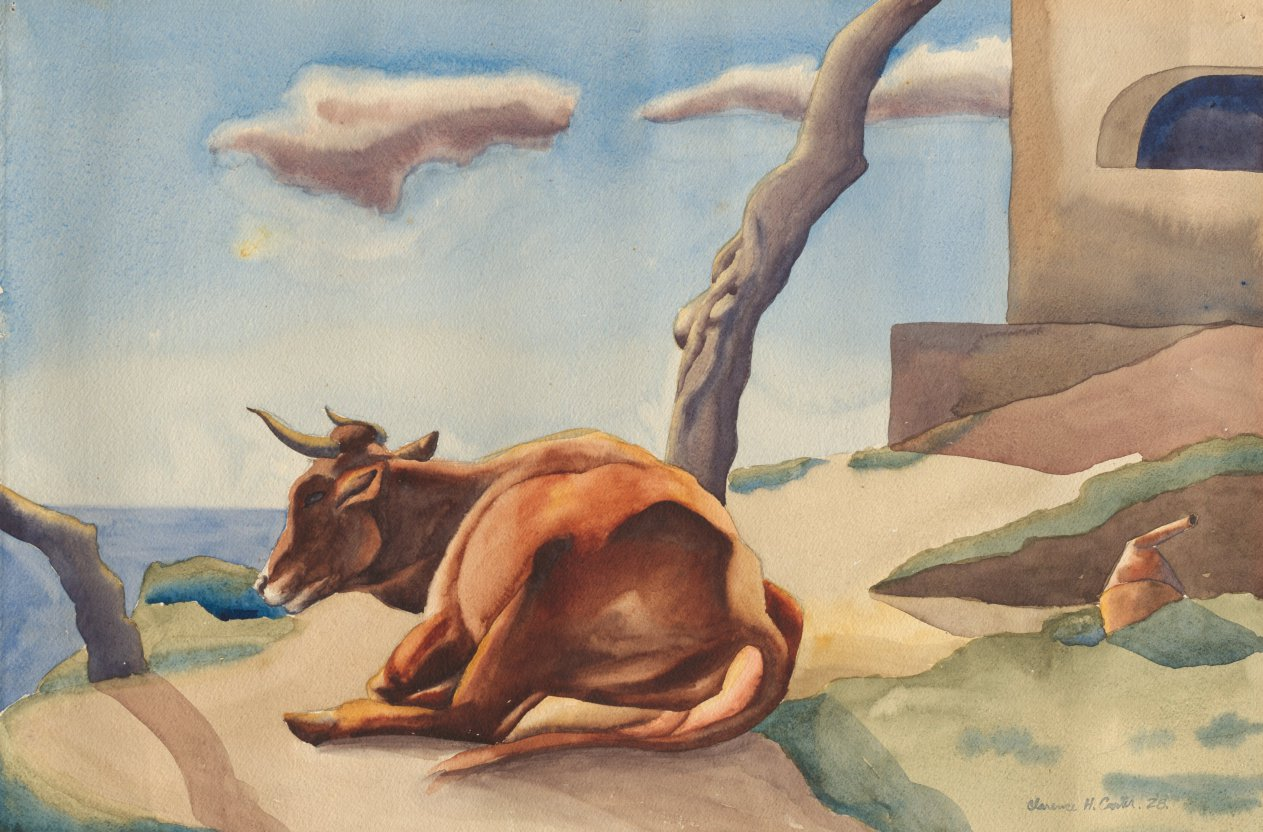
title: The Patient Cow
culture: America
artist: Clarence Holbrook Carter (American, 1904–2000)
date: 1928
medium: watercolor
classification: Drawing